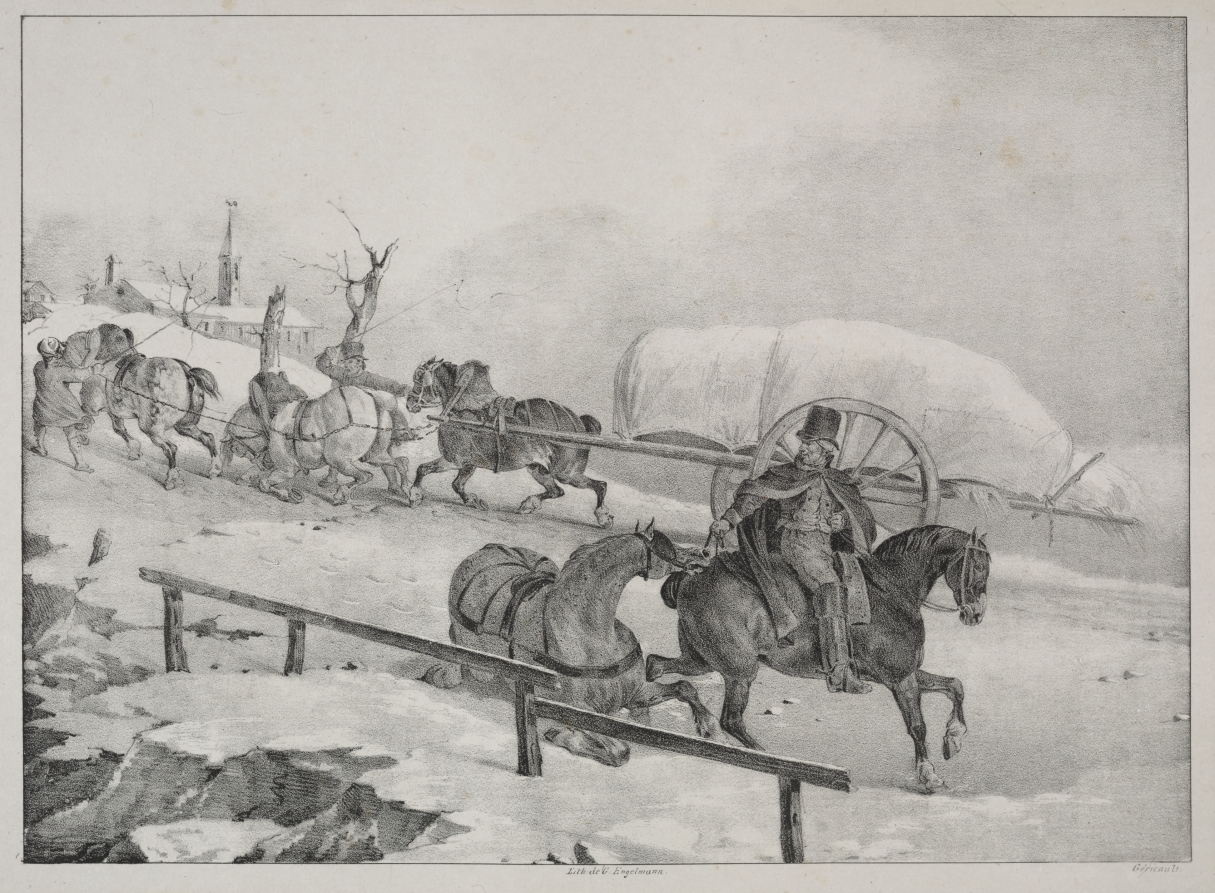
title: Wagoner Climbing a Hill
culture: France, 19th century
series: Four Diverse Subjects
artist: Théodore Géricault (French, 1791–1824)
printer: Godefroy Engelmann (French, 1788–1839)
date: 1823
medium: lithograph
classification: Print